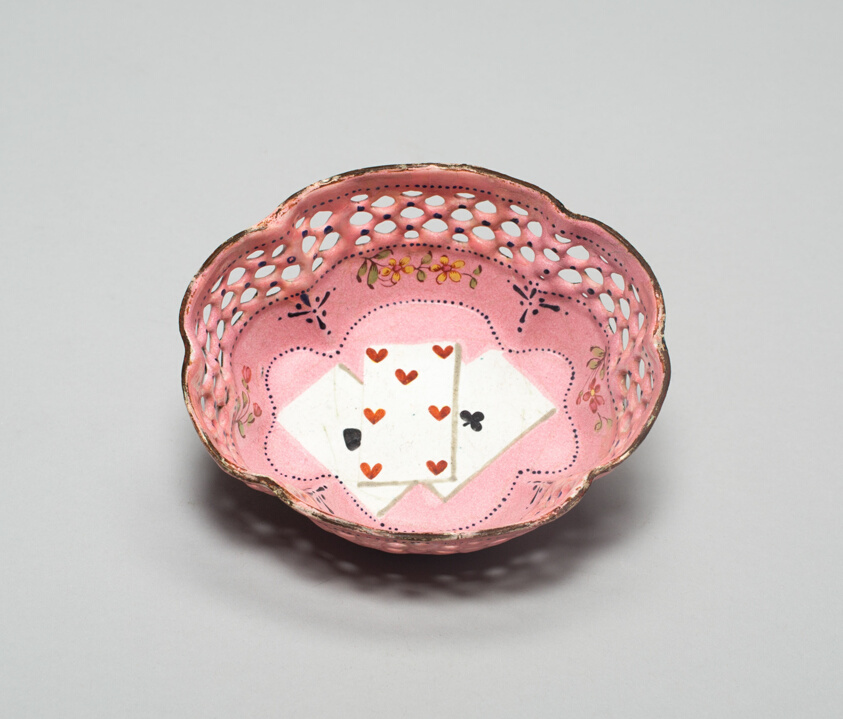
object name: Metalwork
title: Counter Tray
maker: South Staffordshire, England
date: c. 1790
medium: Polychrome enamel on copper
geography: South Staffordshire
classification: tableware; enamel; metalwork